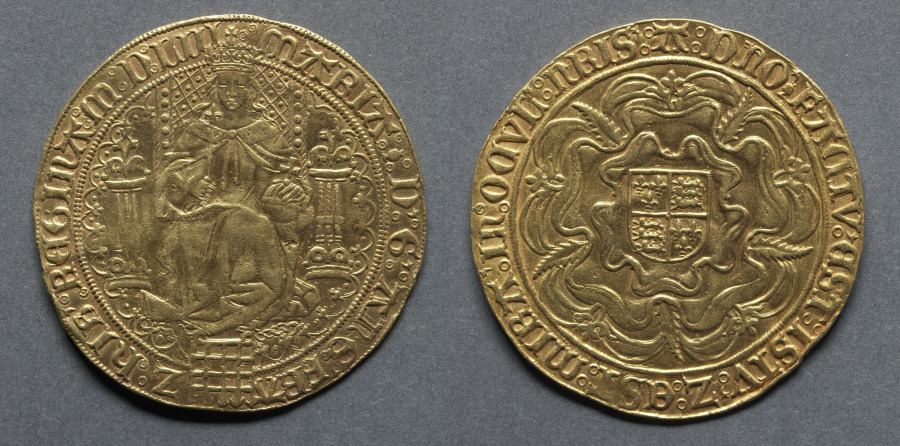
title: Sovereign: Mary Enthroned (obverse); Shield of Royal Arms on a Tudor Rose (reverse)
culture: England, Mary, 1553-1554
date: 1553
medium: gold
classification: Coins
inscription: MARIA: D': G': ANG'. FRA Z: HIB': REGINA: m:D:LIII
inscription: A DNO FACTV EST ISTV Z EST MIRA IN OCVL NRIS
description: Upon ascending the throne, Mary announced that she would restore the coinage to its full value. This sovereign of thirty shillings is of standard gold, 23 carats, 3 1/2 grains. The fine silver pieces of the reign were in metal, 11 oz. fine. These coins are thus of the same fineness as were those of Edward VI; the silver is, in fact, 1 dwt. poorer. This coin is rare and similar to another in the collection from Edward VI, 1969.177. Mary I was the only Tudor monarch to include dates on a sovereign. Roman numerals at the end of the obverse inscription read 1553.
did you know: Mary I, Queen of England from 1553–58, was also known as Mary Tudor, and as "Bloody Mary" to her opponents.